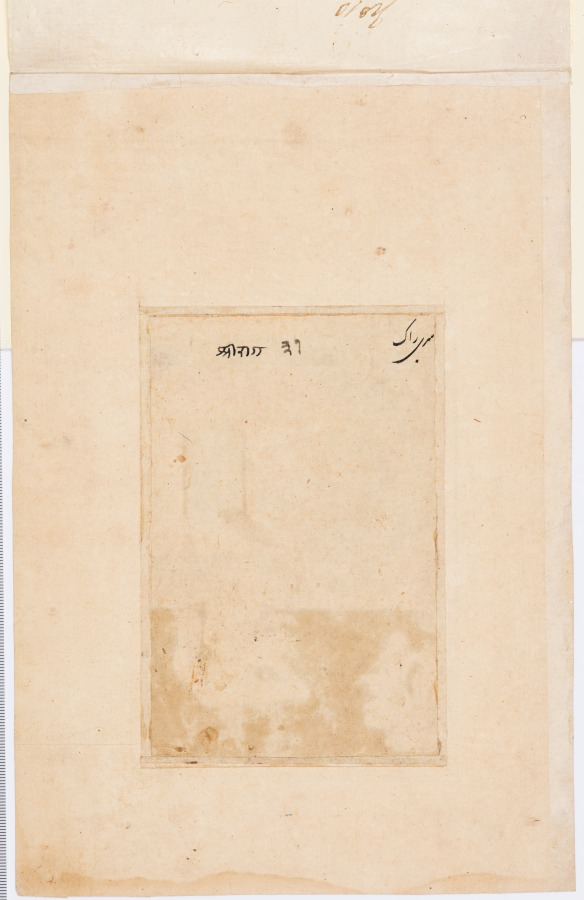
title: Shri Raga, from a Ragamala (Garland of Melodies)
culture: Northwestern India, Rajasthan, Rajput Kingdom of Bikaner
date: 1695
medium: Gum tempera and gold on paper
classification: Painting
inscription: In Nagari on top border ‘srī rāgā’ and Persian number ‘31’. Inscribed ‘śrī rāgā’ in Nagari with Nagari number ‘31’ on verso.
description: Sharing a bottle of wine, the royal couple enjoy the performance of a musician playing a vina and the horse-headed divinity Tumbaru on the cymbals. Tumbaru is a divinity who has the power to increase the prosperity of the realm. This page is from a series that was made on the occasion of Diwali, the Hindu festival of lights.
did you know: The ideal king in this scene is a likeness of the current ruler, Anup Singh (r. 1638–93).